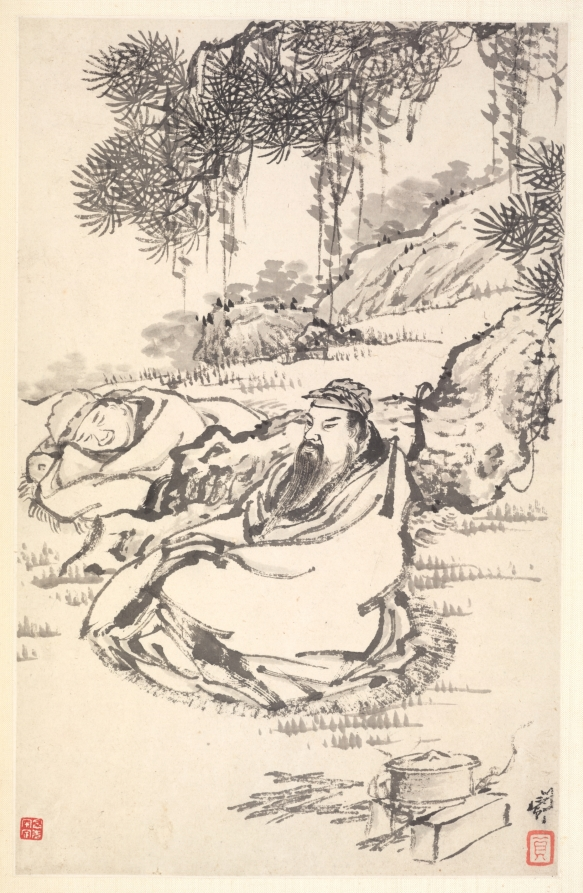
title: Lu Tong and Servant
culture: China, Qing dynasty (1644-1911)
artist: Min Zhen (Chinese, 1730–after 1788)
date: 1788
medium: album leaf, ink on paper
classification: Painting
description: Min Zhen, who was orphaned at age 12 and developed an eccentric personality, was trained by Tang Yin (1682–1756), a writer, playwright, and superintendent of the imperial porcelain workshops in Jingdezhen. The connection to him may have enabled Min to stay in Beijing for a decade from around 1773. It is not clear whether he ever resided in Yangzhou, but his style is in many instances reminiscent of that of Yangzhou artist Huang Shen. This album demonstrates Min’s versatility and mature style in the last years of his life.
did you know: Lu Tong (d. 835) was a Tang dynasty poet and tea aficionado.